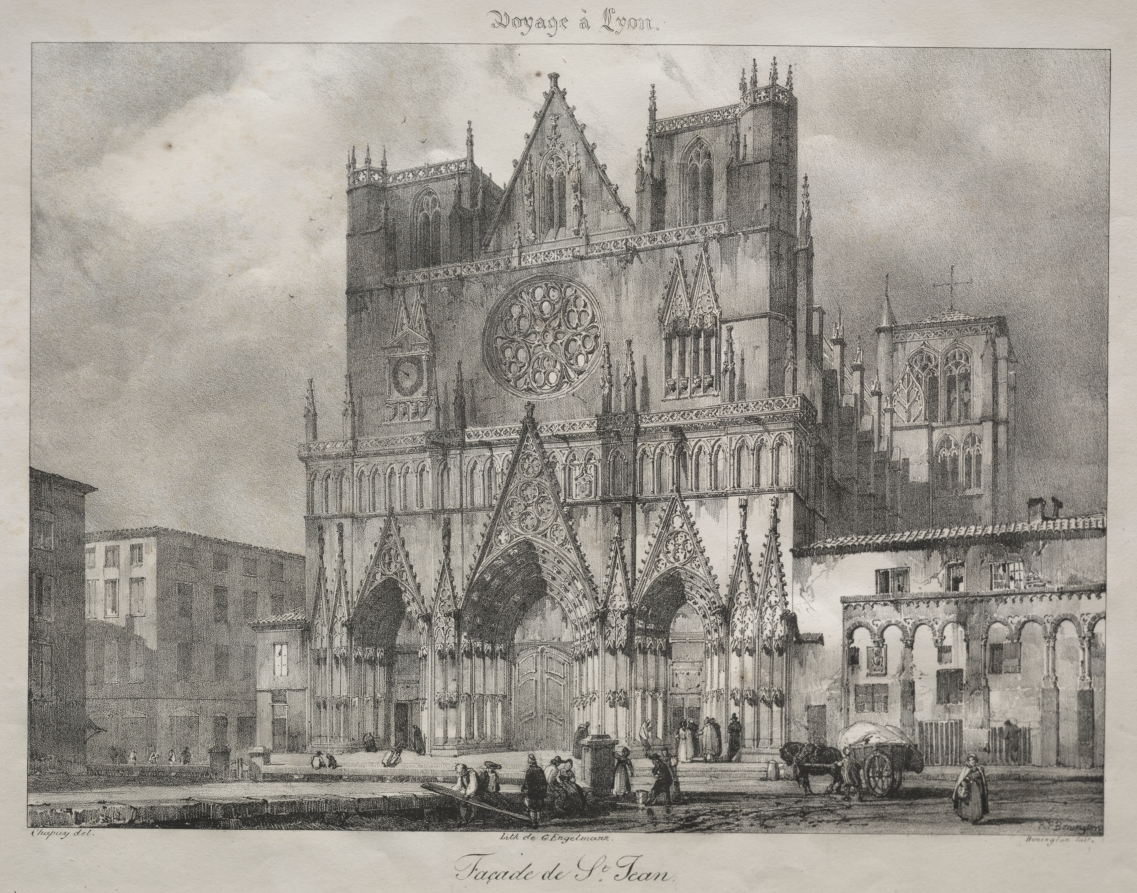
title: Church of Saint John, Lyons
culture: France, 19th century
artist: Nicolas-Marie-Joseph Chapuy (French, 1790–1858)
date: c. 1825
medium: lithograph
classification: Print